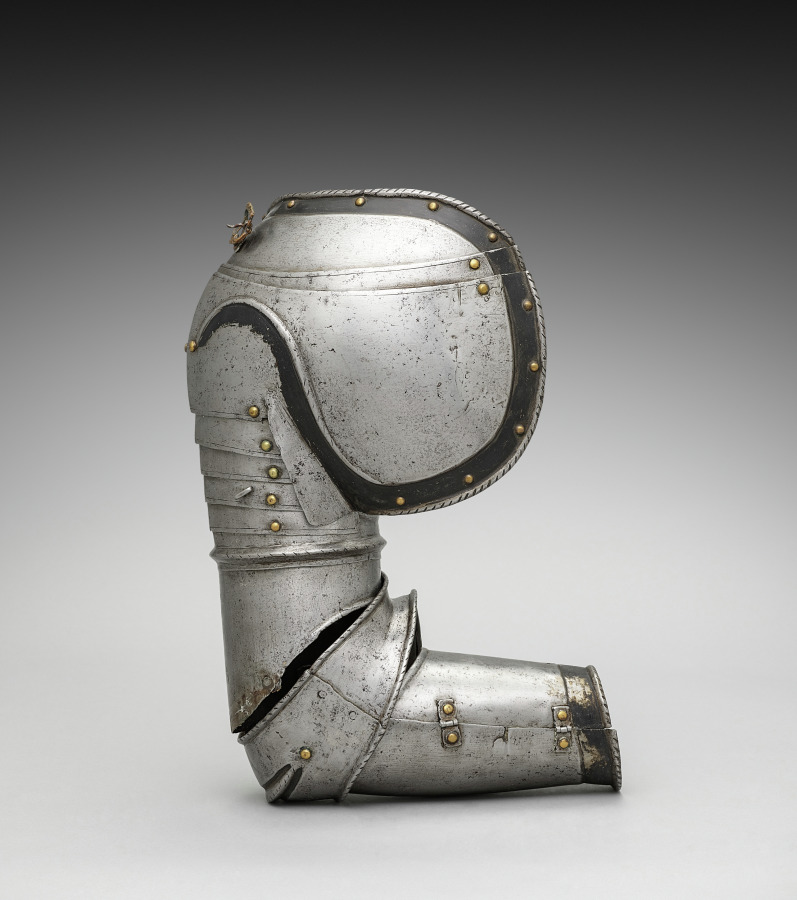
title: Left Pauldron with Rerebrace (upper cannon) and Lower Cannon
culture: Germany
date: c.1550–1570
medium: iron, steel, leather and brass rivets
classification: Arms and Armor